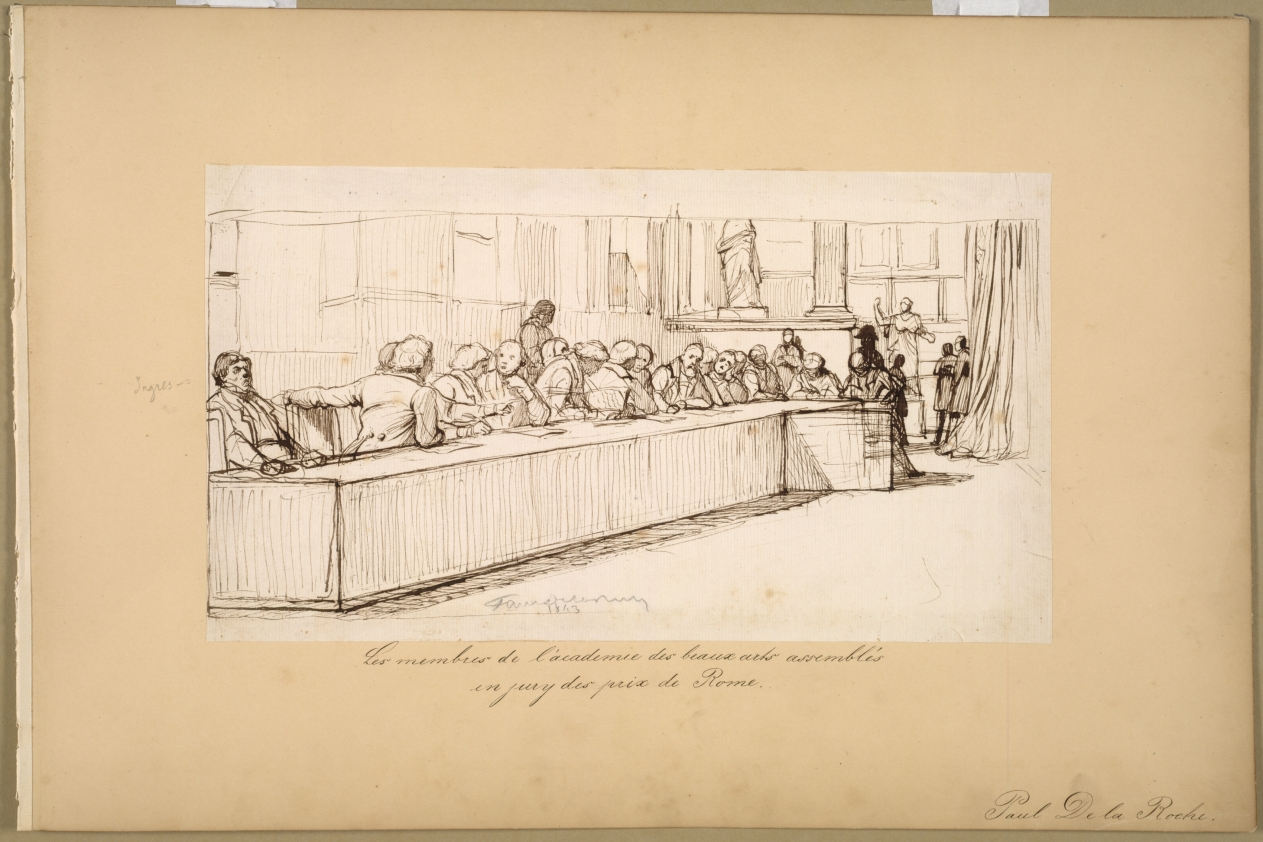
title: The Members of the Academy of Beaux-Arts Assembled to Jury the Rome Prize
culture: France, 19th century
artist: Paul Delaroche (French, 1797–1856)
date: 1841 or 1842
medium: pen and brown ink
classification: Drawing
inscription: lower center, in graphite: PaulDelaroche / 1843; secondary support, left center, in graphite: Ingres-=; lower center, in black ink: Les membres de l'academie des beaux arts assemblés / en jury des prix de Rome.; lower right, in black ink: Paul De la Roche.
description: This sketch records a meeting of the jury of the Rome Prize, an annual award for promising students given by the French Royal Academy of Painting and Sculpture. The prize included a scholarship for several years of study in Rome amid treasures of ancient and Renaissance art. The Rome Prize long represented the first important step toward developing a solid official career as a painter in France. Although most of the men sketched here are unrecognizable, the one closest to the left appears to be the painter Jean-Auguste-Dominique Ingres (1780-1867). The identification allows us to correct the date of 1843 inscribed at the bottom of the drawing, for we know that Ingres did not participate as a jury member in 1843. Instead the sketch must date to 1841 or 1842.